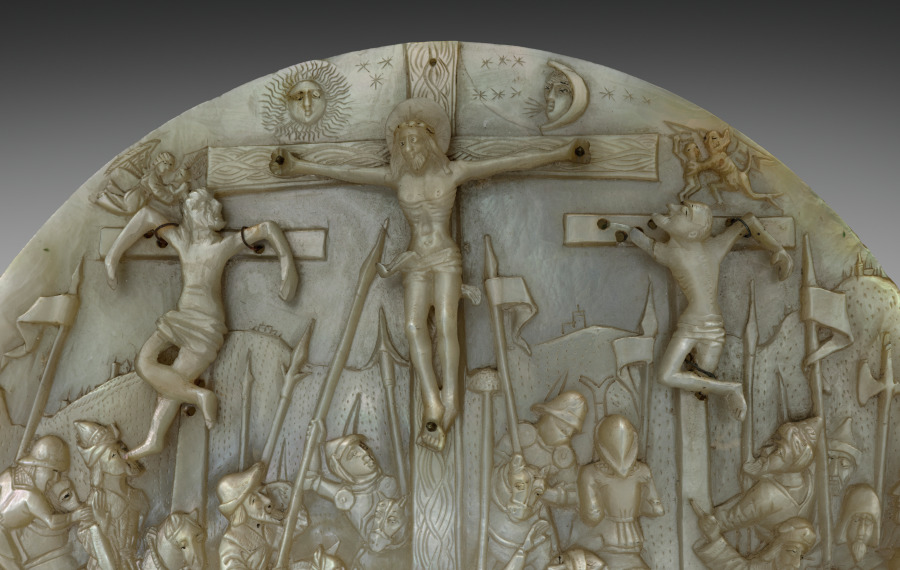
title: Calvary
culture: Germany, Middle Rhine?, 15th century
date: c. 1450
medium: mother-of-pearl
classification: Sculpture